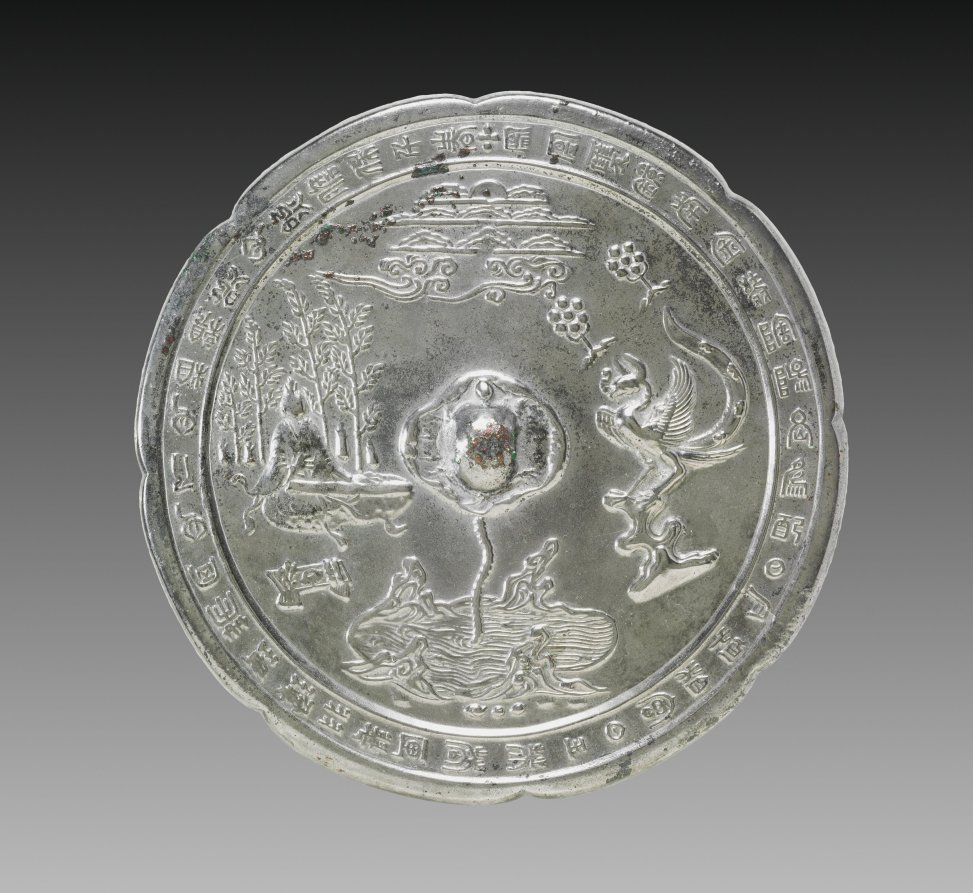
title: Lobed Mirror with a Tortoise Knob, Musician, and Phoenix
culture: China, Tang dynasty (618-907)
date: late 700s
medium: bronze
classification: Metalwork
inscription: 鳳凰雙鏡南金裝。陰陽各為配，日月恒相會。白玉芙蓉匣，翠羽瓊瑤帶。同心人，心相親，照心照膽保千春。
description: The inscription on this mirror states it was one of a pair made of metals from the south, and placed in a jade box, perhaps alluding to a wedding gift. The meaning of its design is not entirely known, but may refer to the Daoist immortal Hou Jin, who played the qin (stringed instrument), understood the language of birds, and could make predictions based on the reflections on water. The motifs of the phoenix, the pond, and the qin may all refer to the quest for immortality.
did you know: The imagery of this mirror includes a tiny turtle knob accompanied by a musician and phoenix.